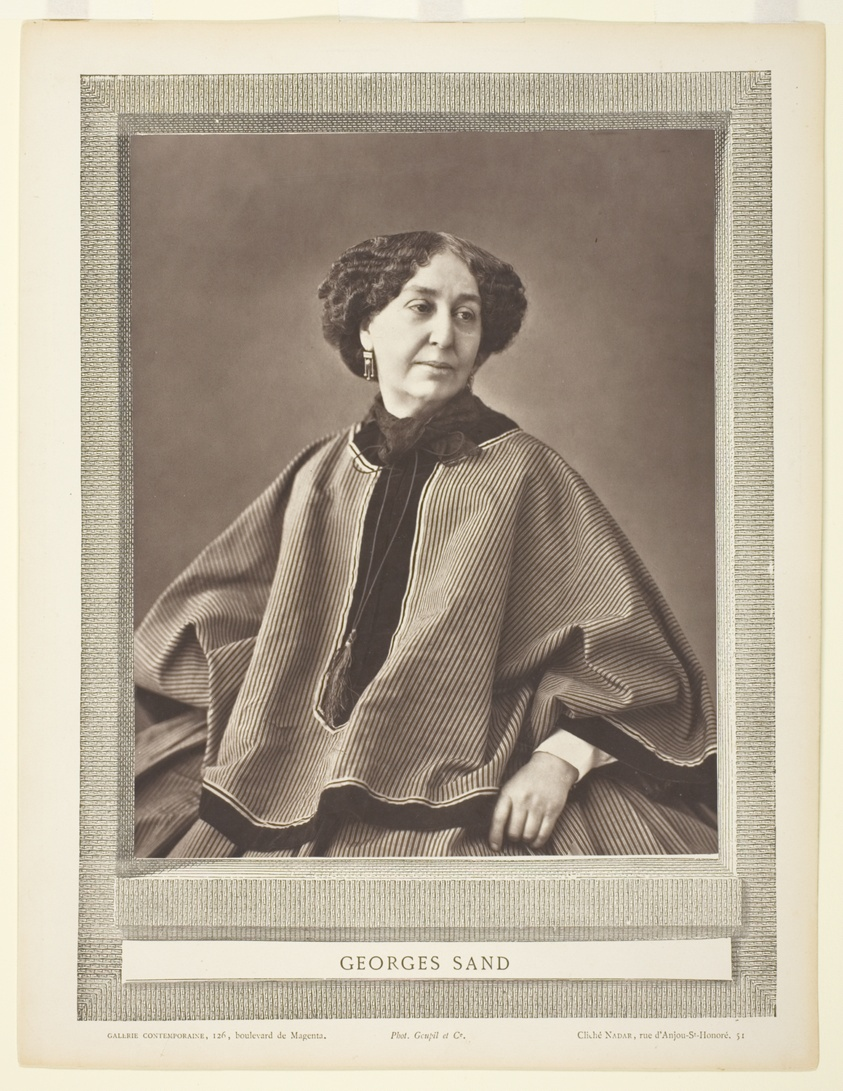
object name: Photograph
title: George Sand (born Amantine Lucile Aurore Dupin, French novelist, 1804-1876)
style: 19th century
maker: Nadar (Gaspard Félix Tournachon) (French, 1820–1910)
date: 1864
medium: Woodburytype, from the periodical “Galerie Contemporaine Littéraire, Artistique” (1877), volume 2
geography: France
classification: woodburytype; photomechanical process; photography; photograph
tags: Collected by Hugh Edwards, Contemporaine Littéraire